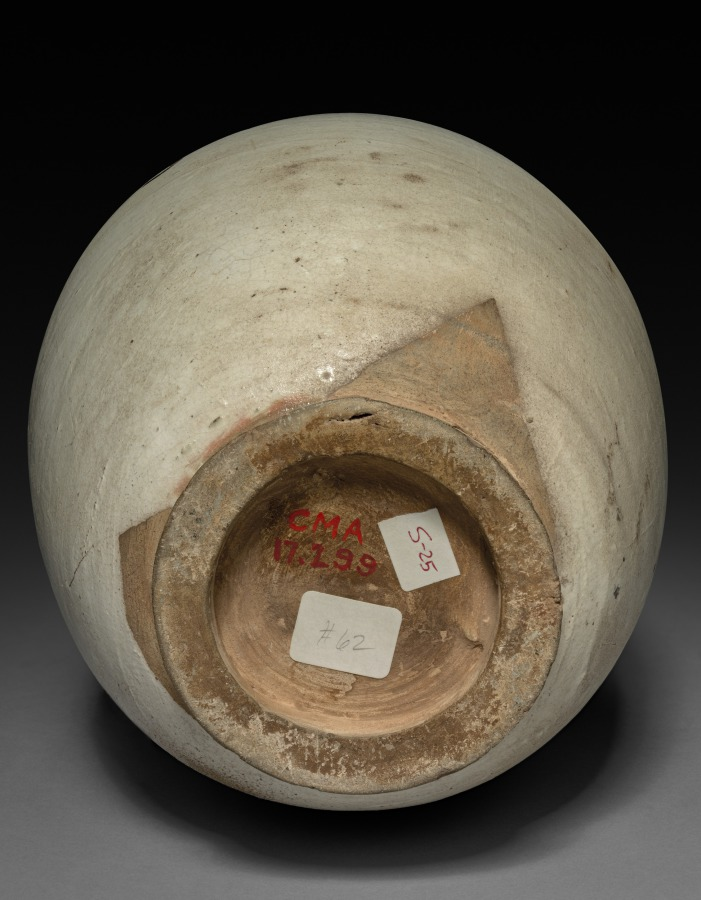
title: Wine Jar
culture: China, Yuan dynasty (1271-1368)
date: 1271–1368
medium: Glazed stoneware; Cizhou ware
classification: Ceramic